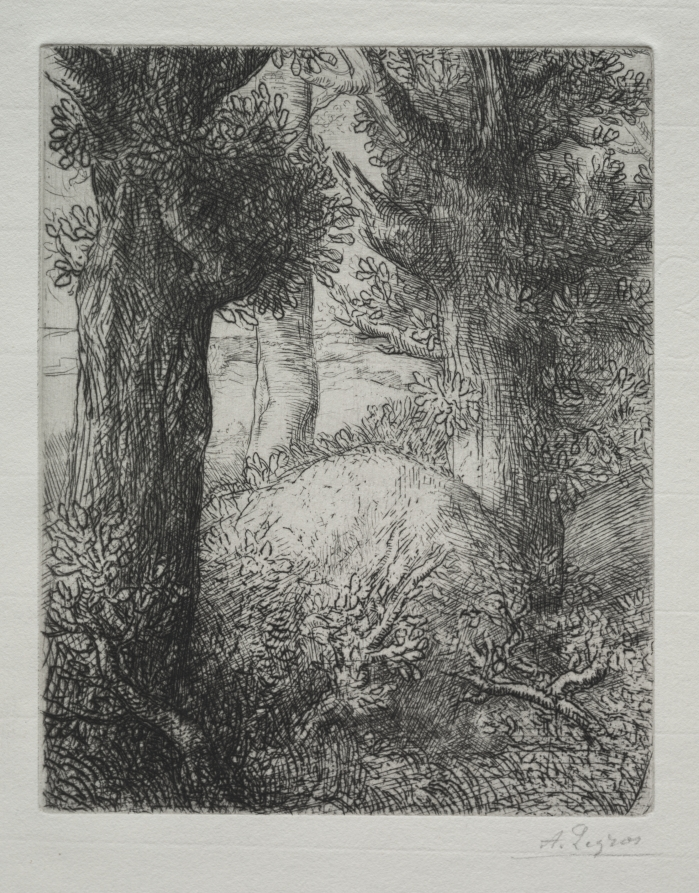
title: Tumulus gaulois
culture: France, 19th-20th century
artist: Alphonse Legros (French, 1837–1911)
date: c. 1857–1911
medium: etching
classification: Print